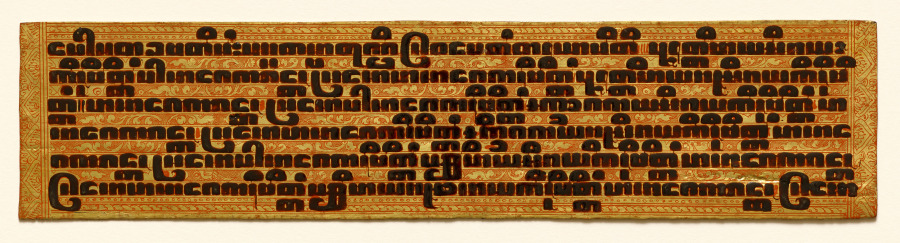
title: Text, folio 11 (recto) from a Kammavacha: Buddhist ordination text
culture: Myanmar (Burma)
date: 1800s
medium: Leaf: lacquer and gilding on cloth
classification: Manuscript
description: In premodern Burma, lay people commissioned lavishly ornamented manuscripts for ceremonial occasions, when officiants would read aloud from the text. Written in black lacquer, the text is in the language of Pali written in a Burmese script. It contains ordination rites and procedures for monastic ceremonies. The second to last page is covered with intricately drawn, winged celestial beings (nats) in gestures of praise. They fly amid intertwining vegetation—denoting bounty—that grows from serpentine forms that refer to rain clouds. Lionlike forms inhabit the space with them. The top and bottom covers are equally ornamented with jeweled floral patterning.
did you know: The Pali text of this manuscript is written in Burmese square script, which is also known as "tamarind seed script."